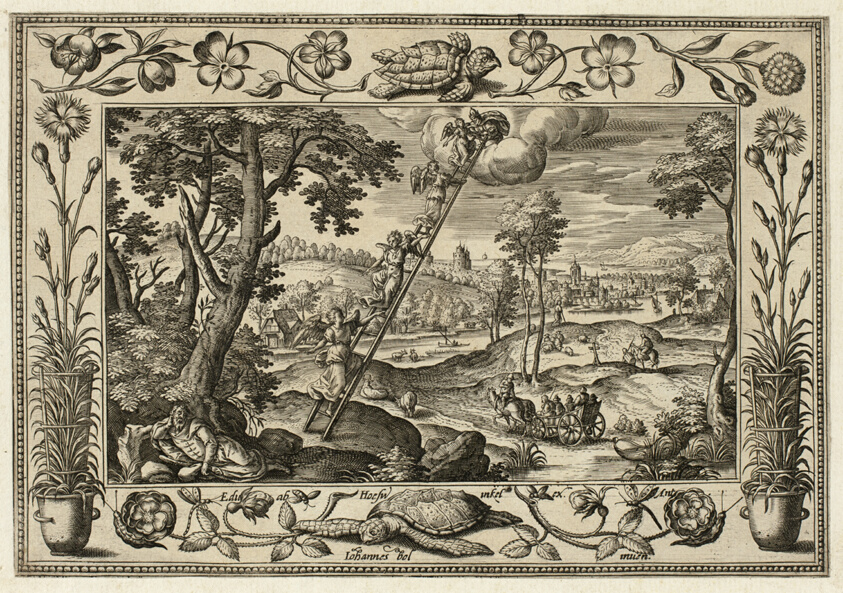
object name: Print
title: Jacob's Dream, from Landscapes with Old and New Testament Scenes and Hunting Scenes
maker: Adriaen Collaert (Flemish, c. 1560–1618); after Hans Bol (Flemish, 1535–1593); published by Anna van Hoeswinckel (Flemish)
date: 1584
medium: Engraving in black on cream laid paper, laid down on cream laid paper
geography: Flanders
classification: engraving; paper; print; prints and drawing